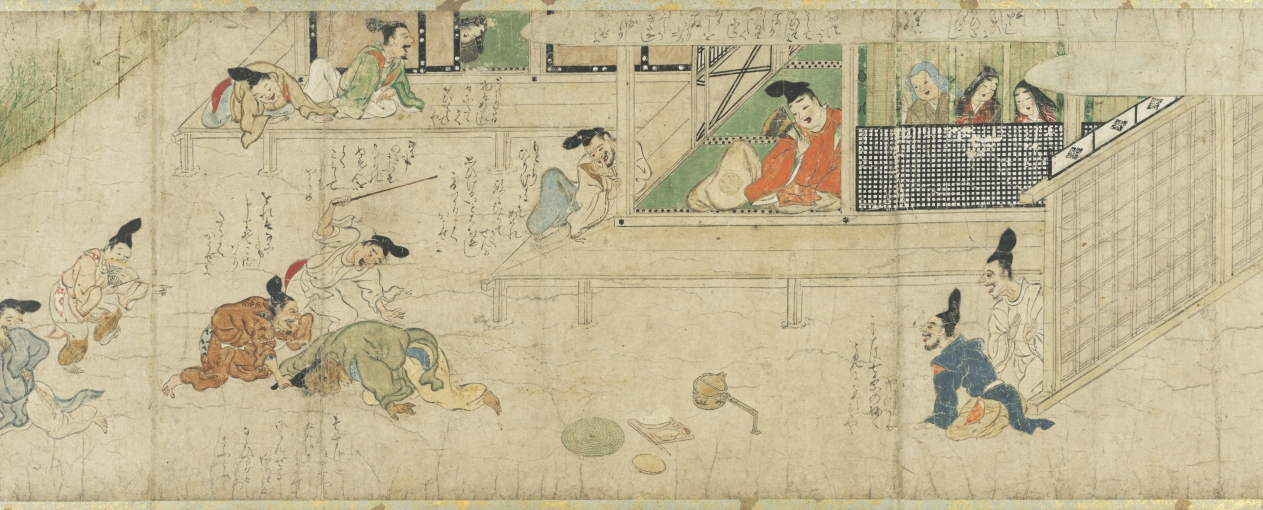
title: The Story of Fukutomi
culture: Japan, Muromachi period (1392–1573)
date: mid-1400s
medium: Handscroll; ink and color on paper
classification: Painting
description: This handscroll shows the second half of an odd tale in which a ne’er-do-well seeks the path to quick fortune and learns the art of musical flatulence. Prior to a major performance, a mentor (and competitor) advises him to consume morning glory seeds, a laxative. Thus, while performing he fouls himself and ends his days in humiliation. The audacious nature of this story and its presentation—well-animated figures with dialogue adjacent to the appropriate moments of action—create a primitive graphic novel. Japanese visual humor about farting preceded this story, but the satirical, mean-spirited twist in this tale suggests its intent was not merely to be humorous. The story was likely commissioned by court officials who disapproved of common performers rising to high positions, outflanking what was the accepted social order.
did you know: This scroll is treasured as the second oldest surviving version of this story.